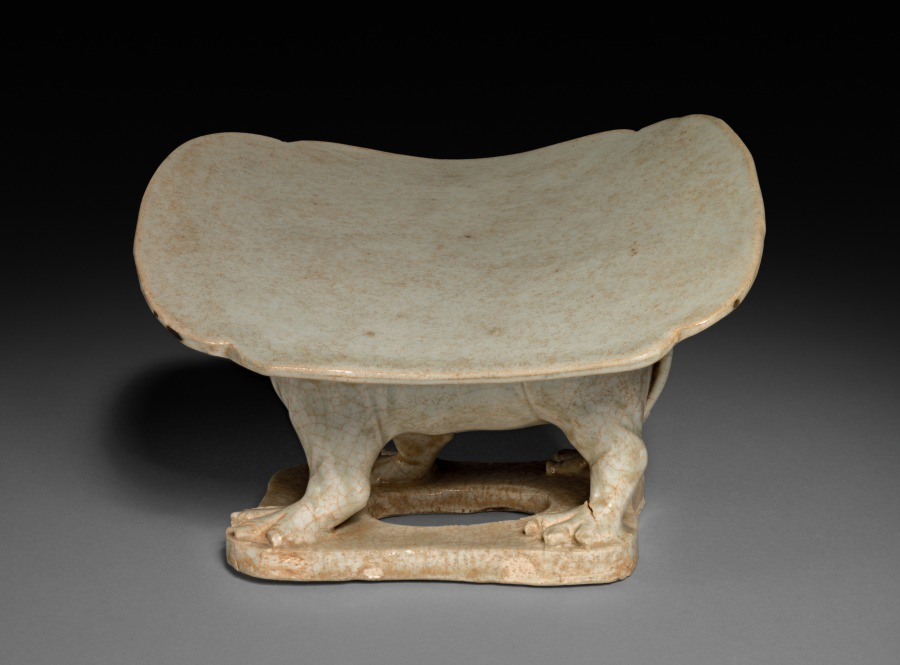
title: Pillow with Lion Base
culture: China, Northern Song dynasty (960-1127)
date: 1000s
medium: Glazed stoneware, qingbai ("blue-white") ware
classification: Ceramic